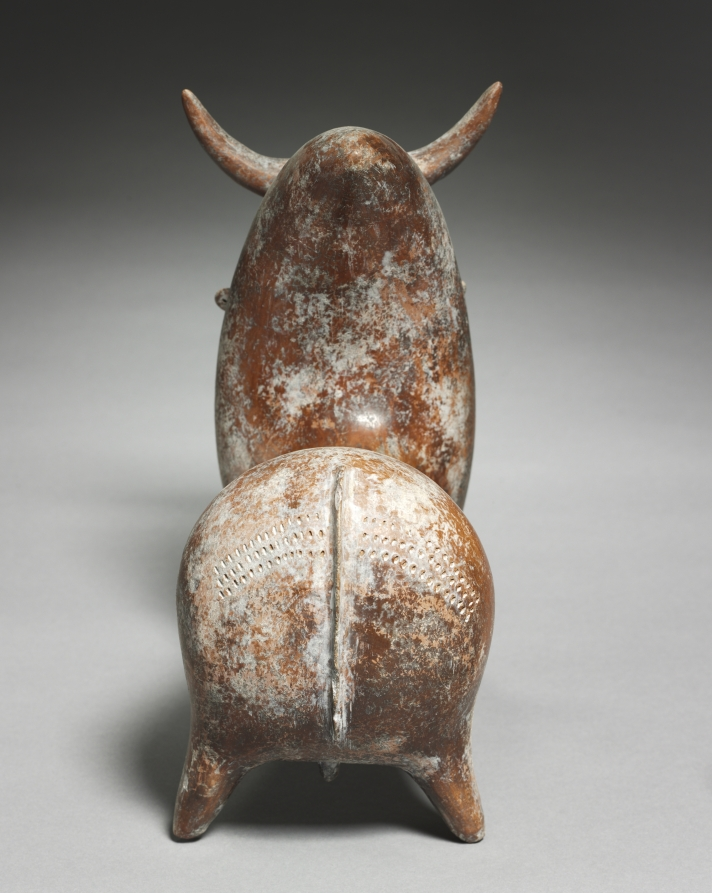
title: Spouted Zebu Vessel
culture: Iran, Marlik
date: c. 1000 BCE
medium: earthenware, burnished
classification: Ceramic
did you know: A zebu, sometimes known as humped cattle, is a species of domestic cattle originating in South Asia.